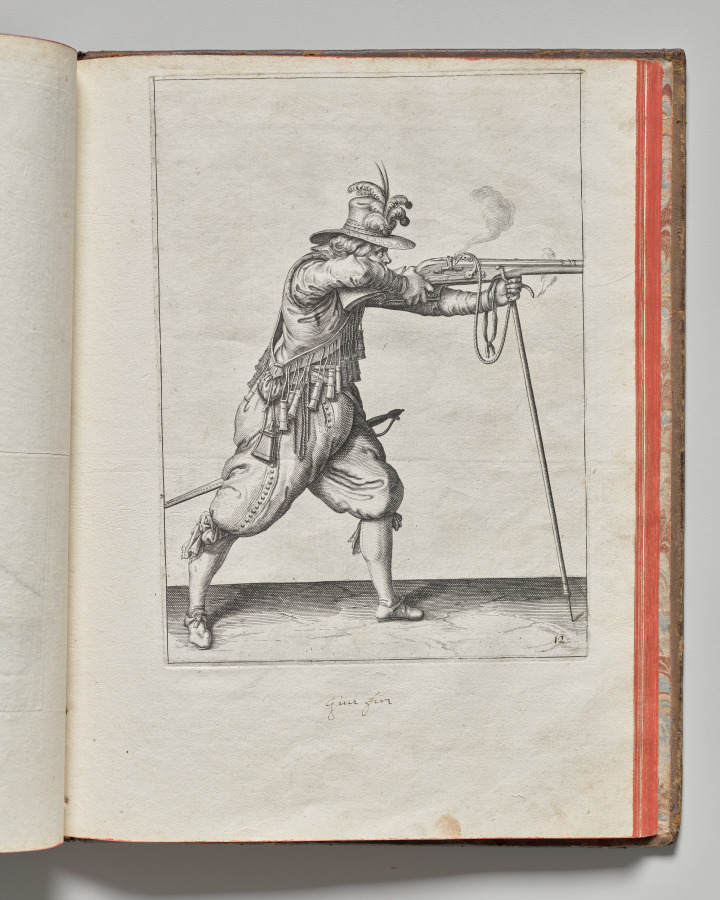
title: The Exercise of Armes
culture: Netherlands, The Hague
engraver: Jacob de Gheyn II (Netherlandish, 1565–1629)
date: 1607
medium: leather bound paper, 117 engraved plates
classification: Bound Volume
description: The Exercise of Armes, published in 1607–8, is one of the most famous manuals of arms. Jacob De Gheyn's book became popular all over Europe and was quickly translated into several languages. Its 117 copper engravings portray the step-by-step sequence for training foot soldiers in the handling of standard weaponry of 17th-century warfare: muskets, matchlock or calivers, and pikes.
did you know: The depiction of the soldiers in this book inspired Rembrandt when painting his famous The Night Watch.